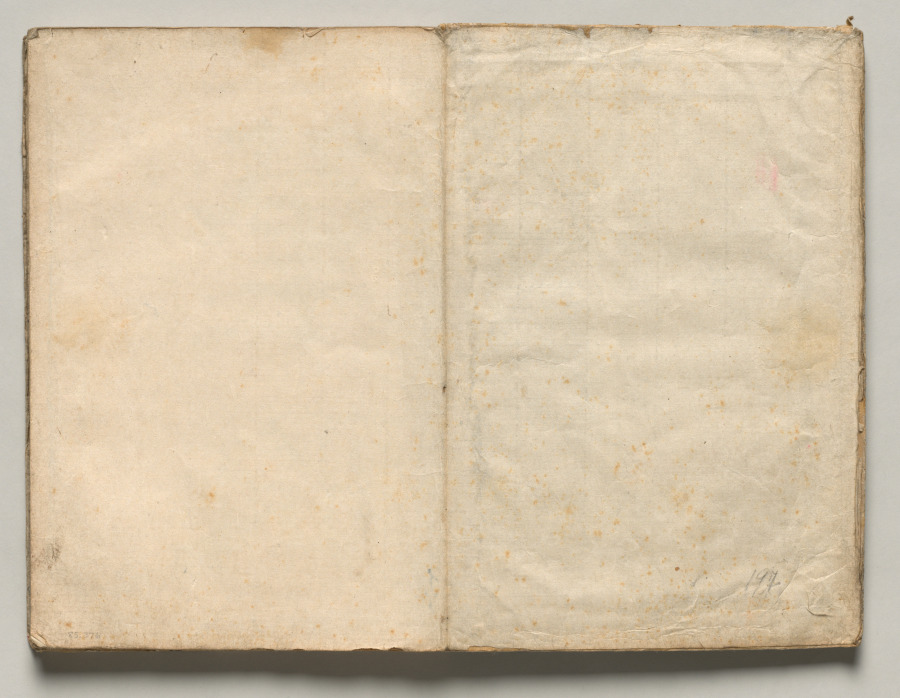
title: Ōkyo Picture Book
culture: Japan, Edo period (1615–1868)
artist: after Maruyama Ōkyo (Japanese, 1733–1795)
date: 1850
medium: accordion-style woodblock printed folding-book; ink and color on paper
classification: Bound Volume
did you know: This impression of a book of woodblock-printed designs is missing a spread that depicts a crane.